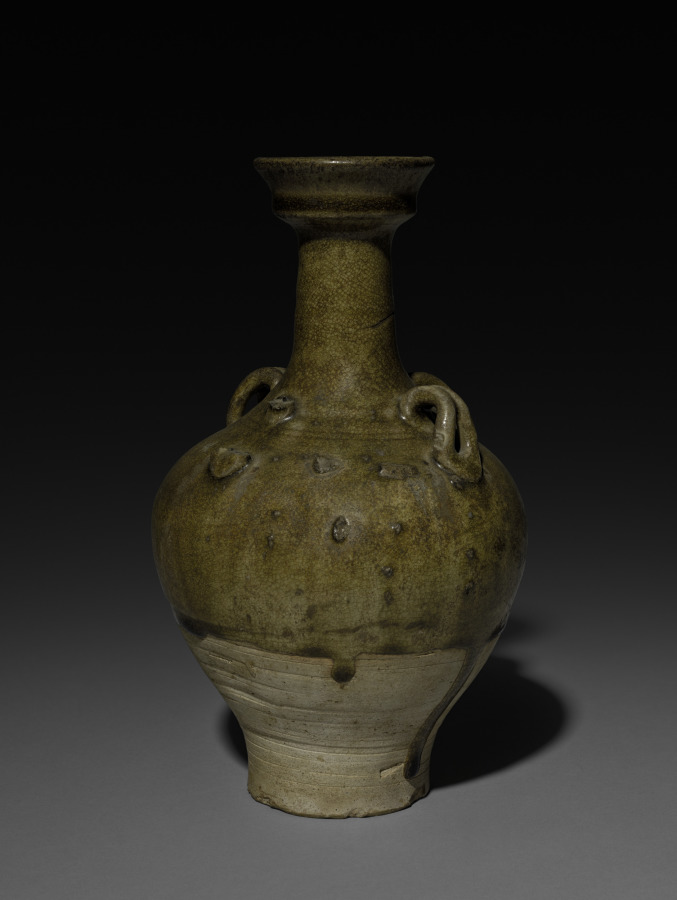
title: Vase with Loop Handles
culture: China, Sui dynasty (581-618)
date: 581–618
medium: glazed stoneware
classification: Ceramic